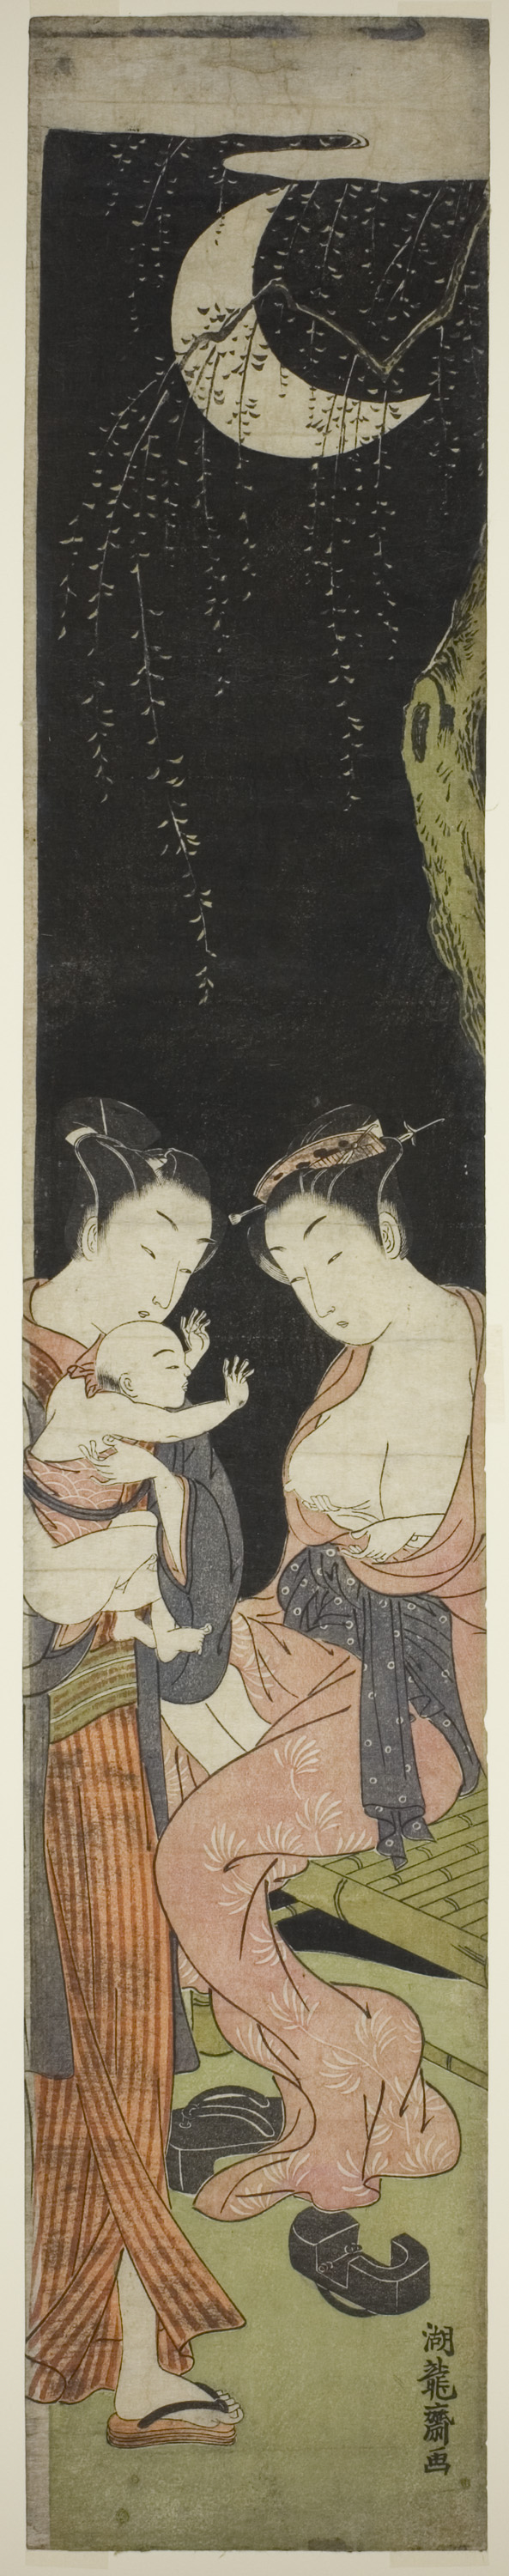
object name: Print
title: Young Couple with Infant Son on a Moonlit Night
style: Japanese (culture or style)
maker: Isoda Koryusai (Japanese, 1735-1790)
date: c. 1770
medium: Color woodblock print; hashira-e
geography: Japan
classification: woodblock print; print; asian art